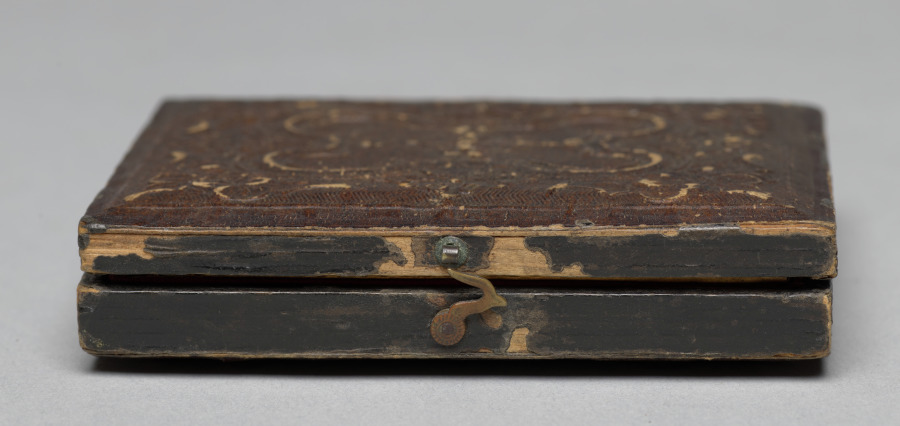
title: Child in off-shoulder polka dot dress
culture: America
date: c. 1860–65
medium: ambrotype, sixth plate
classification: Photograph